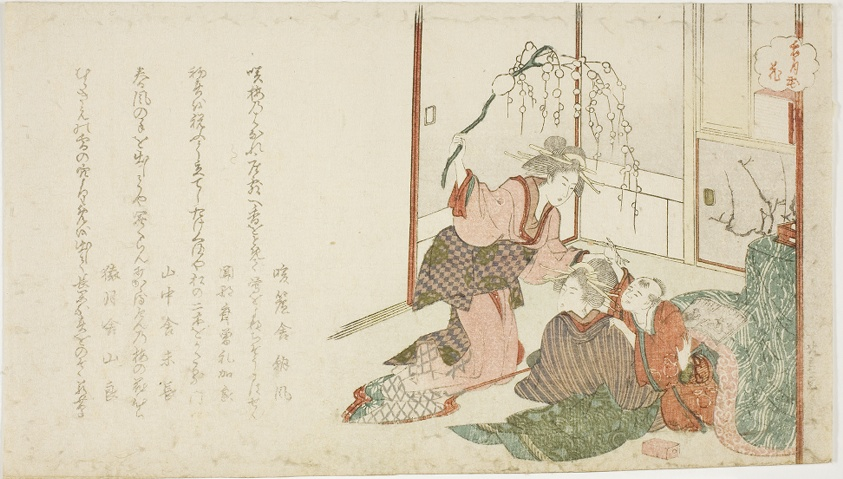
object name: Print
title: Flower (Hana), from the series "Snow, Moon, and Flowers (Setsugekka)"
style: Japanese (culture or style)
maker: Teisai Hokuba (Japanese, 1771-1844)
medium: Color woodblock print; surimono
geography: Japan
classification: woodblock print; print; asian art